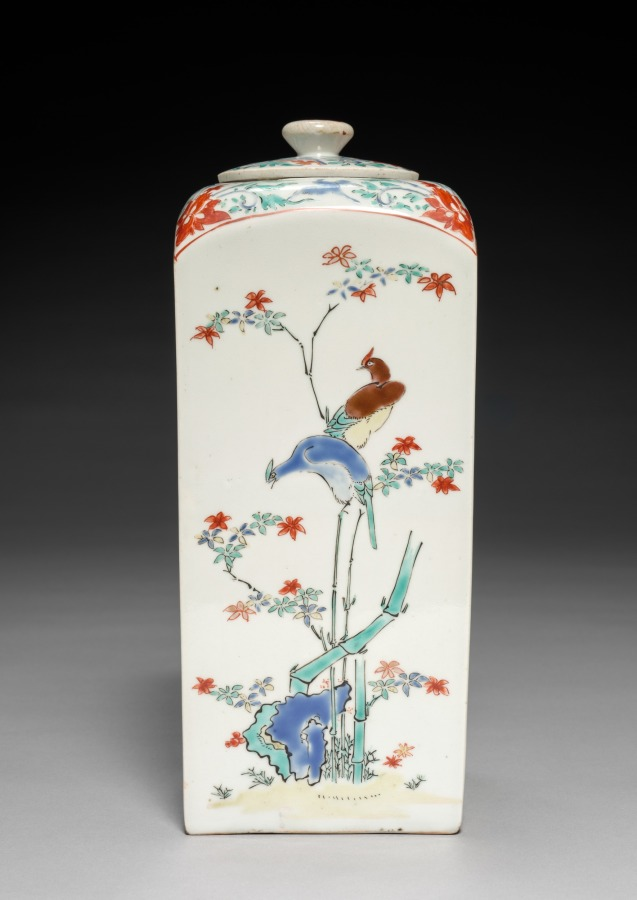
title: Square Jar with Birds and Flowers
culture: Japan, Edo period (1615–1868)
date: late 1600s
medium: Porcelain with overglaze color enamels and gold (Hizen ware, Kakiemon type)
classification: Ceramic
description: This lidded square jar was likely paired with a complementary yet nonidentical mate. The pine tree, plum, and bamboo together form the frequently depicted motif known as the Three Friends of Winter (shōchikubai), so named because of their hardy perseverance in the cold. Each side also features a pair of birds, including cranes on one face and pheasants on another.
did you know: A jar like this was fired at a high temperature, painted with colored enamels, and then fired again at a lower temperature.